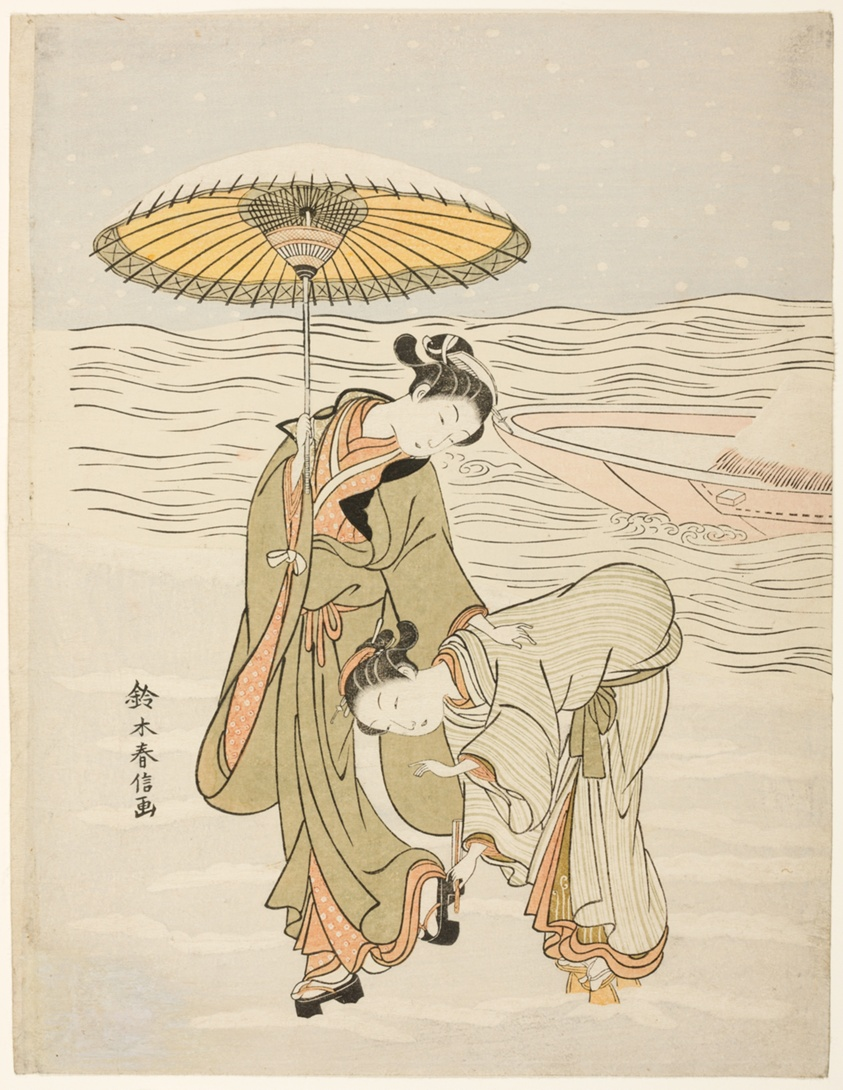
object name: Print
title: The Snow-Clogged Geta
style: Japanese (culture or style)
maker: Suzuki Harunobu 鈴木 春信; Japanese, 1725 (?)-1770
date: c. 1767/68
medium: Color woodblock print; chuban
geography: Japan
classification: woodblock print; print; asian art